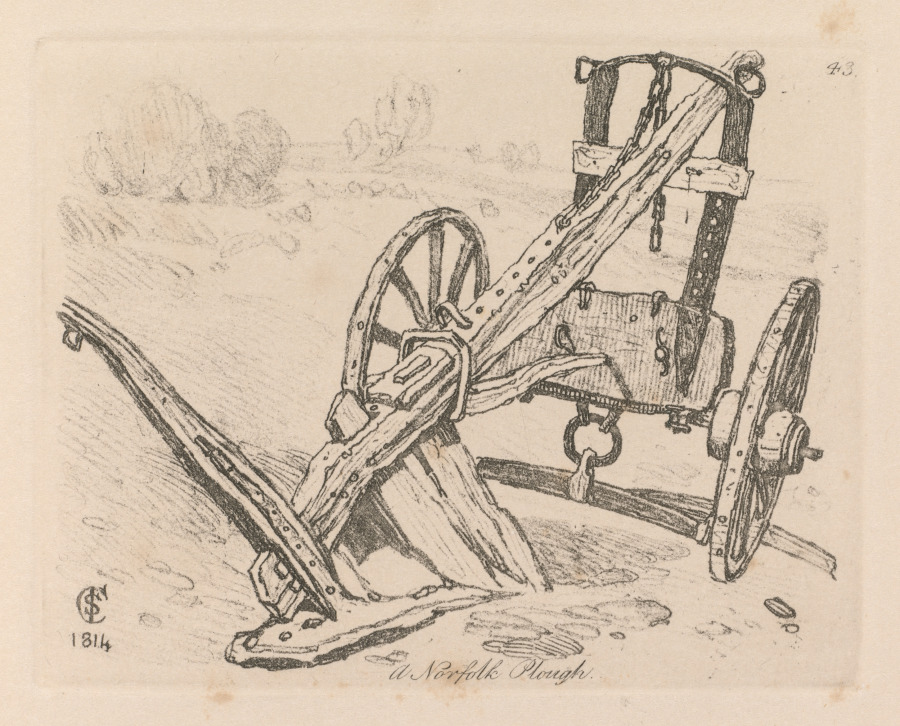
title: Liber Studiorum: Plate 43, A Norfolk Plough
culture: England, 19th century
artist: John Sell Cotman (British, 1782–1842)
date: 1814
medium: softground etching, from a bound volume containing 48 plates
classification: Bound Volume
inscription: In plate, within image, upper right: 43; in plate, lower left, within image, monogram: S inside a C with a line down the center above 1814; in plate, center, within image: A Norfolk Plough